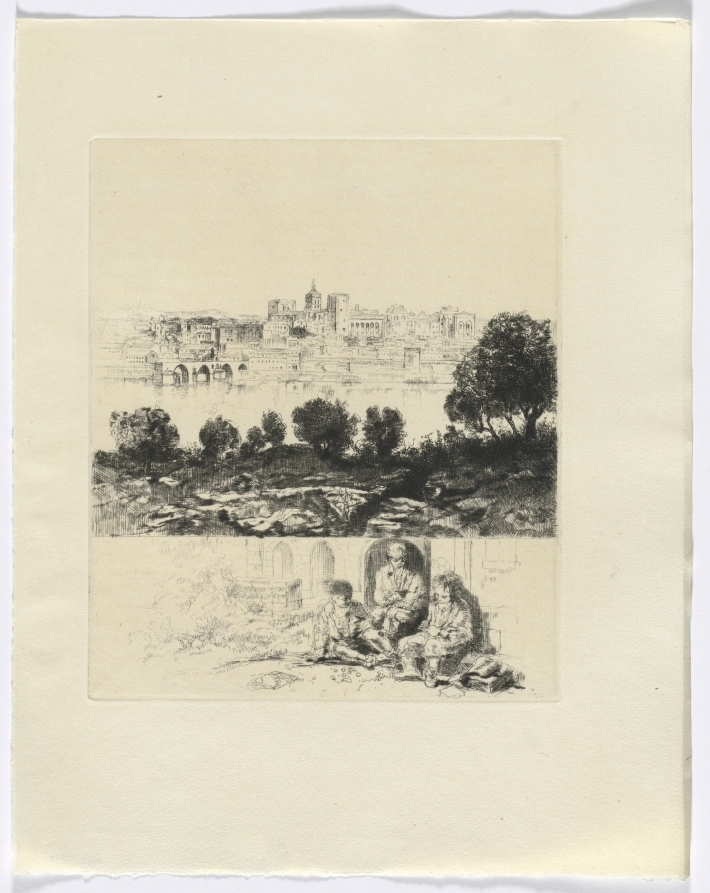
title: Frédéric Mistral: Mémoires et Recits by Frédéric Mistral: landscape with river and city view/ three figures (insert after p. 72)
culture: France, 20th century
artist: Auguste Brouet (French, 1872–1941)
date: 1937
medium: etchings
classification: Portfolio